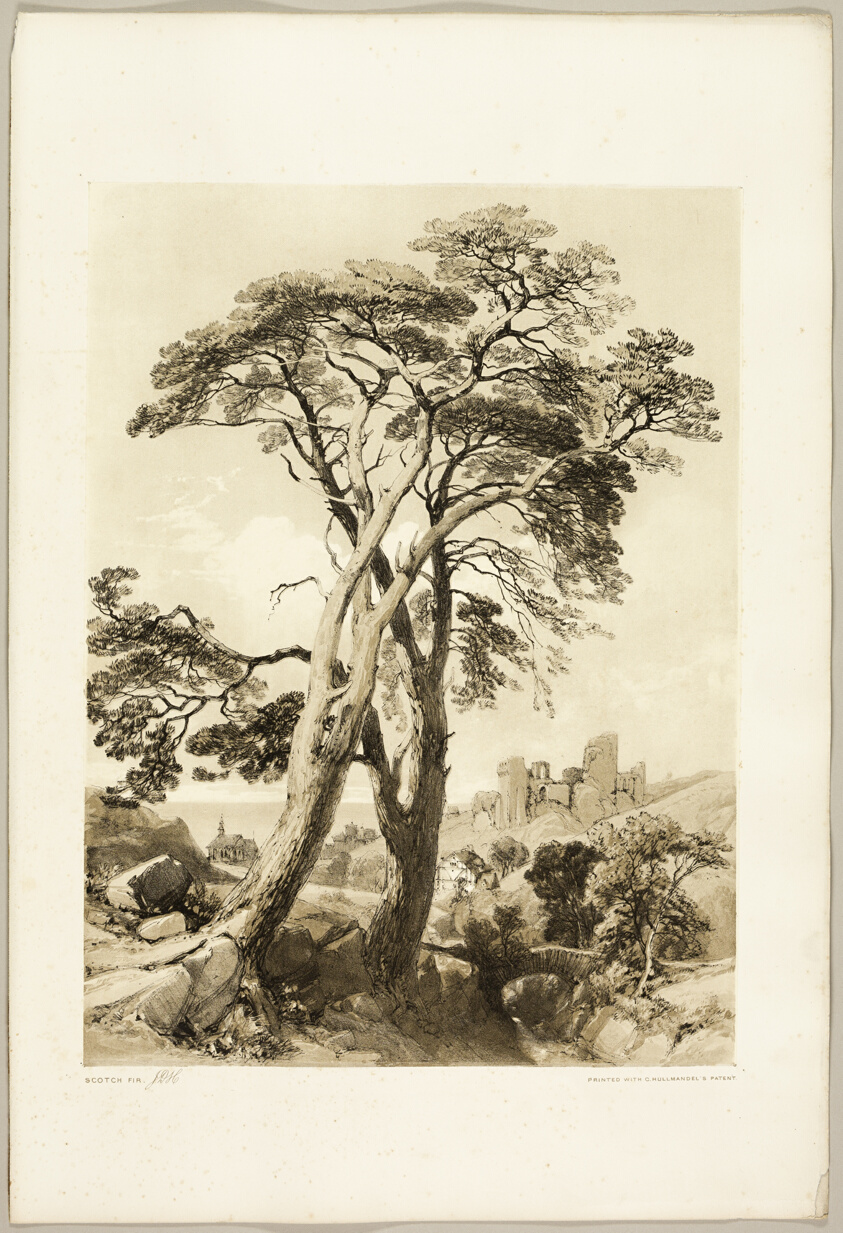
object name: Print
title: Scotch Fir, from The Park and the Forest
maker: James Duffield Harding (English, 1798-1863); printed by Charles Joseph Hullmandel (English, 1789–1850); published by Thomas McLean (English, 1788–1875)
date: 1841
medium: Lithograph in black, with brown tint from a second plate, on ivory wove paper, laid down on ivory wove paper (chine collé)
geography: England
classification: lithograph; print; prints and drawing